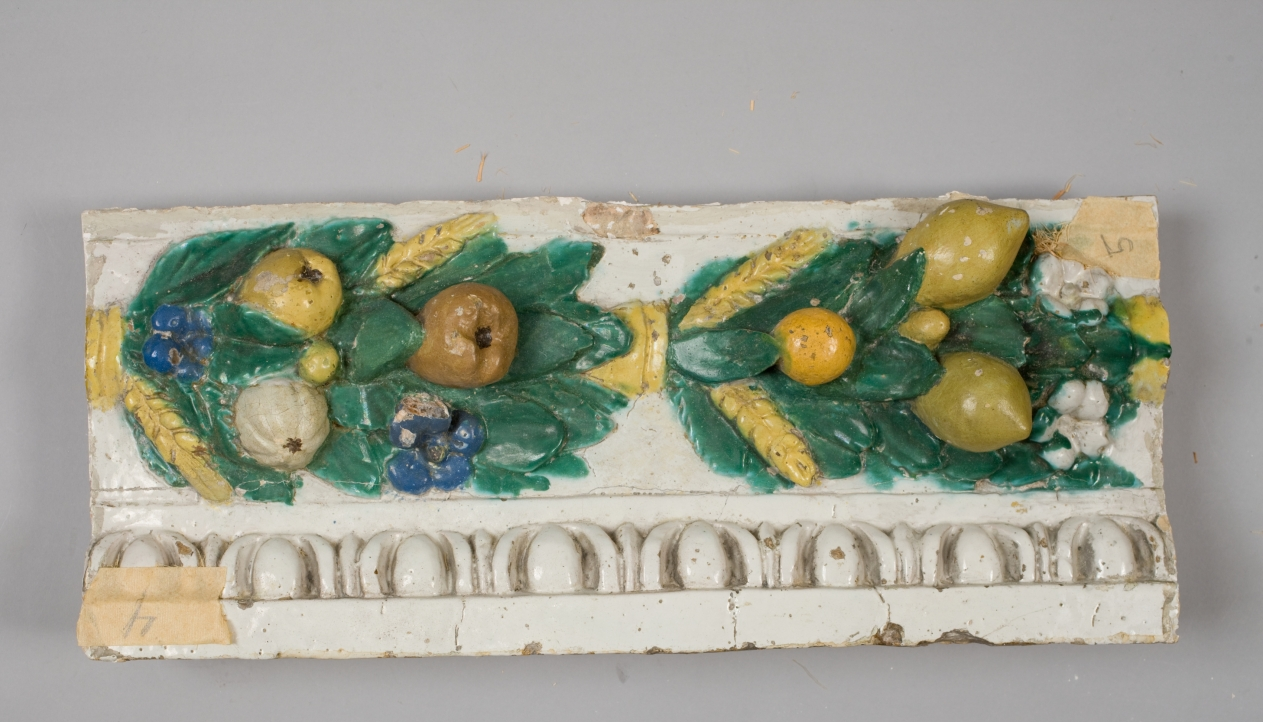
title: Fragment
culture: Italy, Florence, 16th century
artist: Benedetto Buglioni (Italian, 1461–1521)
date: c. 1900–1910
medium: glazed terracotta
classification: Sculpture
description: The Madonna sits upon a throne with the Christ Child standing on her knee. He is steadied by his mother, turning delicately to grasp the Virgin's robe for support. On the left is St. Francis, identified by his stigmata. On the right, St. Anthony Abbot is identified by his monk's robe and T-shaped walking stick. The brown robes of the saints, the purple of the Virgin's tunic (a shade characteristic of the artist), and the flesh tones of the figures contrast strongly against the bright blue background. In the semicircular sky behind the figures, three winged cherub heads emerge, representing a host of angels. The inclusion of St. Francis in this altarpiece honors the saint, suggesting that the altarpiece may have been originally built into the wall of a Franciscan institution in Tuscany. Two shields bearing the Borgherini family crest appear in the lower portion of the altarpiece's border, further suggesting that the chapel for which this altarpiece was made was likely owned or endowed by the family. Glazed terracotta is both durable and decorative and the gleaming white of this piece would have stood out in the darkness of a church. The medium was made popular by Renaissance artist Luca della Robbia and came into fashion as a substitute for expensive carved marble. A rounded arch frame embellished with fruit and flower garlands as well as egg-and-dart and cord moldings accompanied the work when it was acquired, but was later determined not to be original and removed. Buglioni's work bears the influence of the della Robbias, particularly in the simple color scheme. Buglioni likely worked in the studio of Luca's nephew, Andrea, where he would have learned the technique of glazing terracotta.